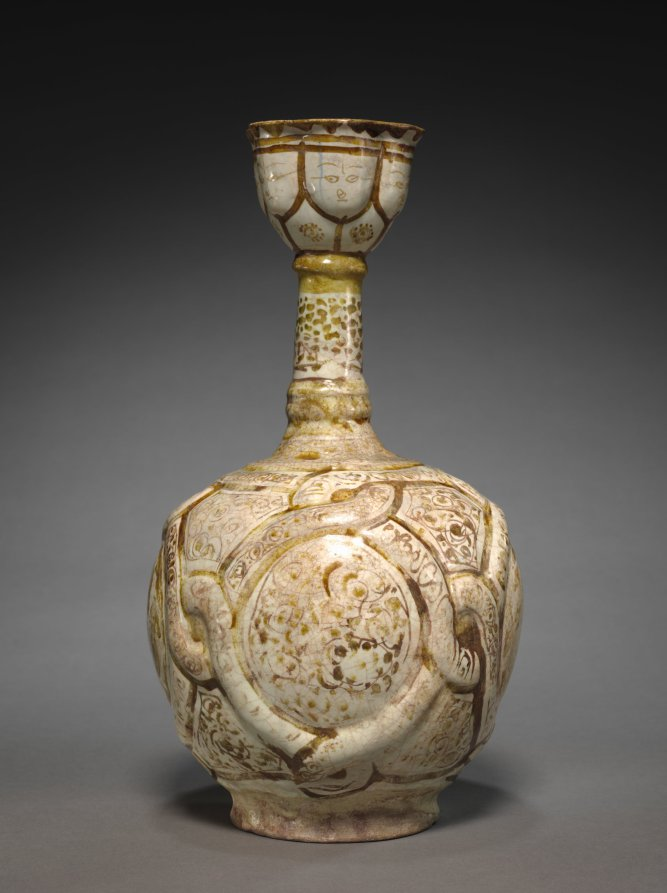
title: Jug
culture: Iran, Rayy, Seljuk period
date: late 1100s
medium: fritware with luster-painted design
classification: Ceramic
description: Fritware Where fine clay was unavailable, potters made a paste out of ground quartz, clay, and glass. When fired, the paste created a compact white material called fritware that approximated the appearance of porcelain.